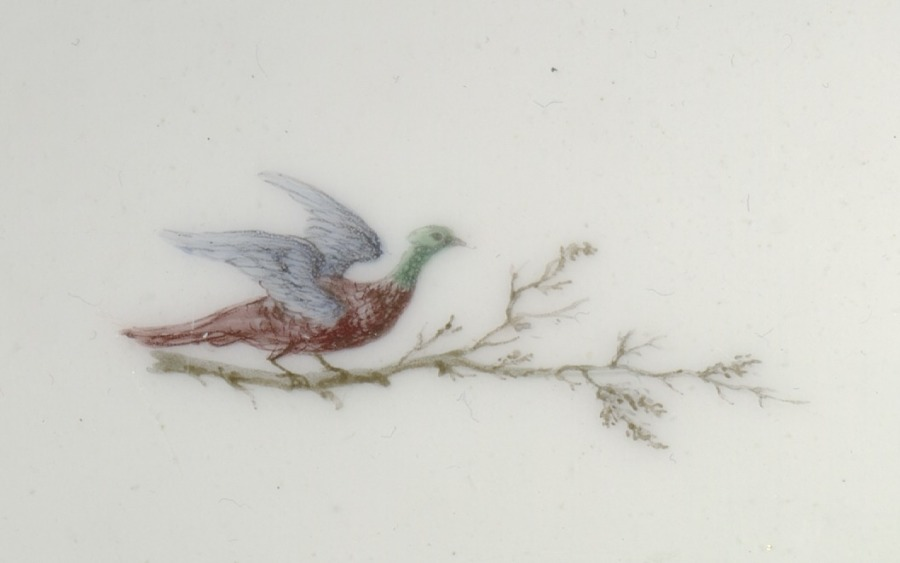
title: Covered Tureen (Terrine ancienne or Terrine ordinaire)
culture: France, Vincennes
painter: attributed to Louis-Denis Armand (French, active c. 1745–1783)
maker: Vincennes Porcelain Factory (France, 1740–56)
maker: probably by Jean-Claude Duplessis le Père (French, 1690–1774)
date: c. 1752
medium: soft-paste porcelain with enamel and gilt decoration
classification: Ceramic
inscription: [Interlaced foliate 'L's surmounted by a fleur-de-lys (indicating royal commision), in blue]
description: The intricately painted birds that decorate this tureen are the work of Louis-Denis Armand. Armand was known for his depictions of birds and landscapes, a specialty that may have come from his work as a painter of lacquered furniture with similar compositions. This tureen was likely designed by master goldsmith Jean-Claude Duplessis who began working as an artistic director at the Vincennes Porcelain Factory in 1748.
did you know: This object was manufactured in soft-paste porcelain, a material used by many European porcelain factories before they were able to emulate the hard-paste porcelain of China and Japan.